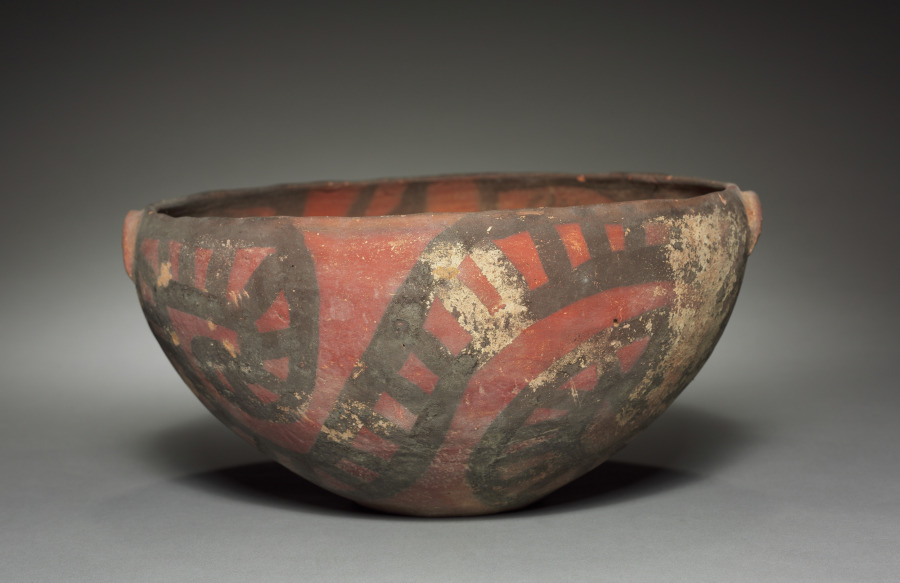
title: Two-Handled Bowl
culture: Argentina, Santamariana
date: 1000–1500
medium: earthenware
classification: Ceramic